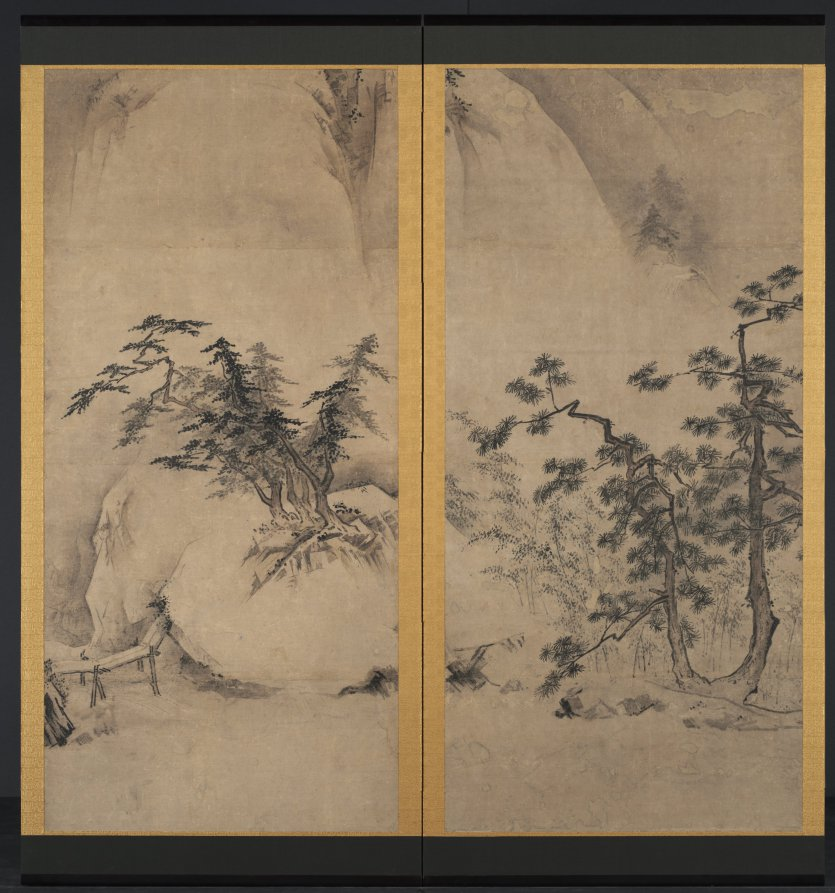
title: Winter and Spring Landscape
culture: Japan, Muromachi period (1392–1573)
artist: attributed to Tenshō Shūbun (Japanese)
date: early to mid-1400s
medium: Six-panel folding screen; ink and slight color on paper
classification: Painting